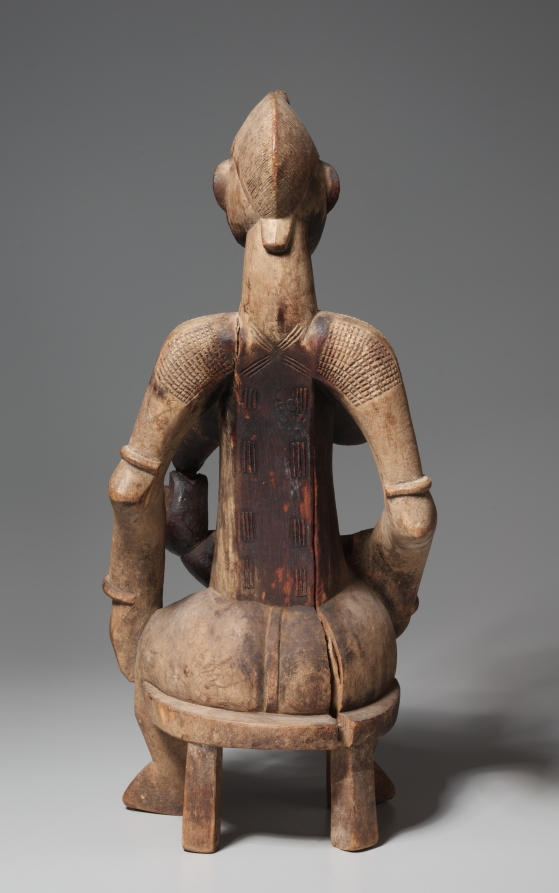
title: Nursing Woman with Child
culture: Africa, West Africa, Côte d'Ivoire, reportedly Korhogo area, Senufo-style carver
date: 1800s-1900s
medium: Wood and organic material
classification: Sculpture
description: Beyond its specific depiction of a mother nursing her child, this sculpture symbolizes a larger concept of ancestral motherhood that is central to Senufo society, in which cultural inheritance is matrilineal. The darkened areas of wood come from oils applied to its surface as both libations and surface protectants. In some Senufo beliefs, one of the most important founding ancestors is the Great Mother or Ancient Woman (Katyeleeo or Maleeo). In groups that believe in the Great Mother, she suckles male initiates with the "milk of knowledge." Through this process, youths gain the information they need to become adults (that is, fully human). The simplified appearance of the "child" in this sculpture reflects his unformed, pre-initiated state.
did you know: The mother’s face, adorned with incisions and markings, resembles that of women who have reached puberty.